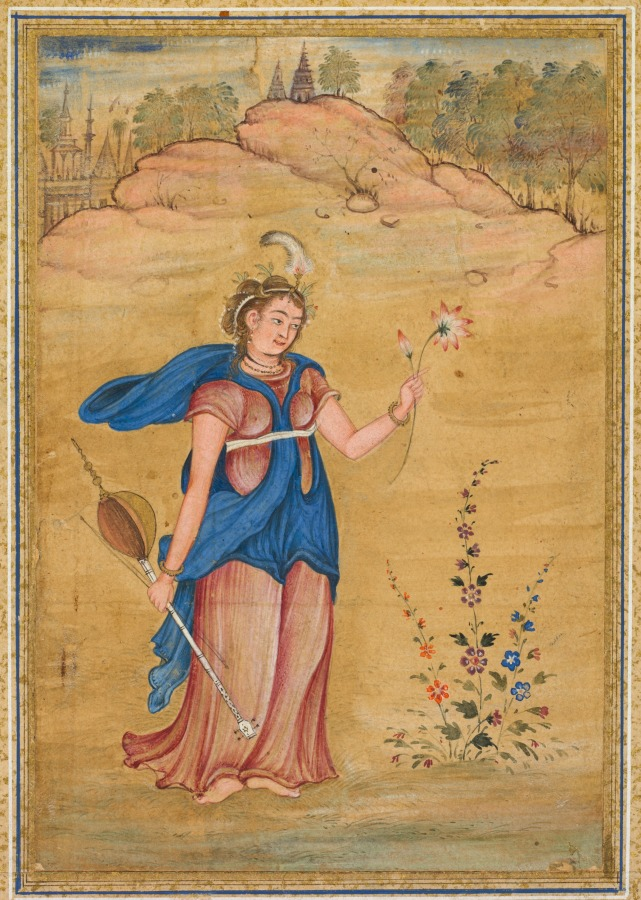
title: A female figure standing in a landscape holding a four-stringed “khuuchir” and a lotus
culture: Mughal India, court of Akbar (reigned 1556–1605)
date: c. 1590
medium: Gum tempera and gold on paper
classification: Painting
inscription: [verso, upper left, sticker] 1027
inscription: [verso, right of sticker, in pencil] 24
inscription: [verso, upper center, in pencil, upside down] VI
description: Standing over flowering sprigs, holding a lotus like a scepter, the figure seems to magically impart fertility to a desert. In pan-Indian religious iconography (system of visual symbols that identify a figure), the lotus is held by the goddess of good fortune, prosperity, and abundance, who is frequently associated with ideal kingship. The stringed instrument recalls the Indian goddess of learning and music, but here it is of a Mongolian type, as is the feather in her crown. Her garments are reminiscent of those worn by biblical and classical figures in European engravings. This painting combines Indian, European, and Mongolian references.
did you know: The four strings of the woman’s khuuchir would have been made from silk.